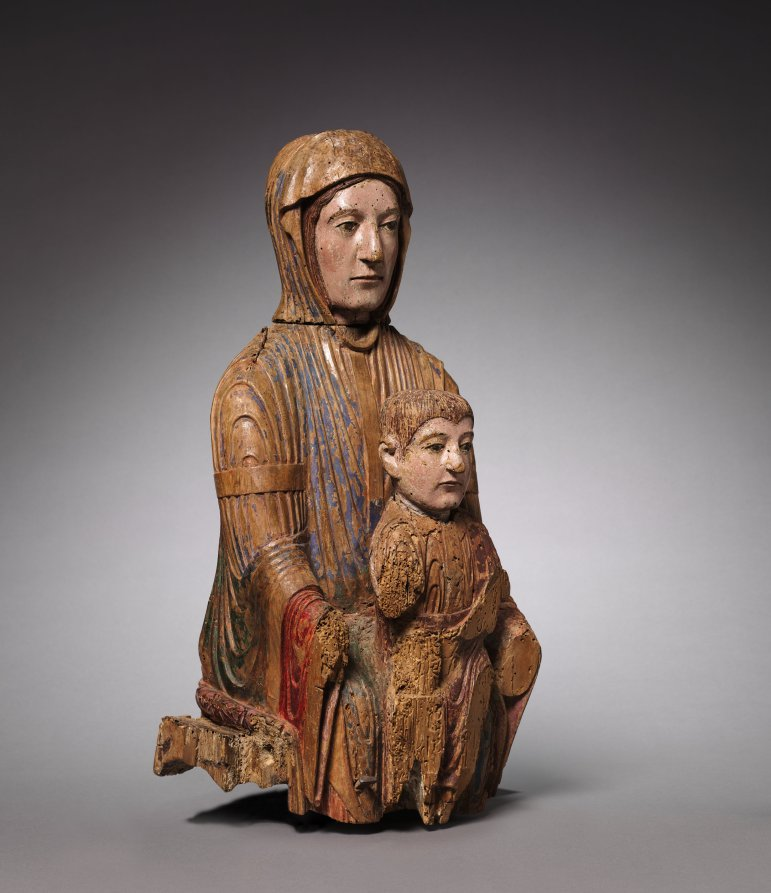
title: Virgin and Child in Majesty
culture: France, Auvergne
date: c. 1150–1200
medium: polychrome wood (walnut)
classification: Sculpture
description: This sculpture belongs to a group of early representations of the Virgin and Child known as the Sedes Sapientiae (the Throne of Wisdom). The subject embodies a complex and core Christian doctrine of the Virgin’s role in the Incarnation (the moment in which Christ became flesh) and ultimately in the redemption of humankind. Mary faces forward, her gaze toward the beholder. As she is seated on a throne, she in turn becomes the throne to the Christ child, thus symbolizing her role in giving birth not only to the human Jesus, but also to the divine Christ. The Incarnation gave Mary a unique role as principal mediator between heaven and earth, and between God and humankind. As a result, her image proliferated in art, especially after the 12th century, a period in which there was surging interest in Mary’s life and increasing devotion to her person and images. The sculpture belongs to a rare group of surviving figures produced in the Auvergne region of central France during the second half of the 12th century. These "Auvergne" Virgins are estimated to number only about 25 or 30 and are characterized by their linear, calligraphic draperies, which form beautiful swirls and contours. All such sculptures are smaller than life-size and made of wood in order to make them mobile. Evidence suggests that they were moved from altar to altar or church to church, and were frequently carried in procession within churches and town streets on Marian feast days. The heads were intentionally removable in order to "dress" them in costumes for such processions.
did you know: In this sculpture of Mary and Jesus, their heads are detachable.